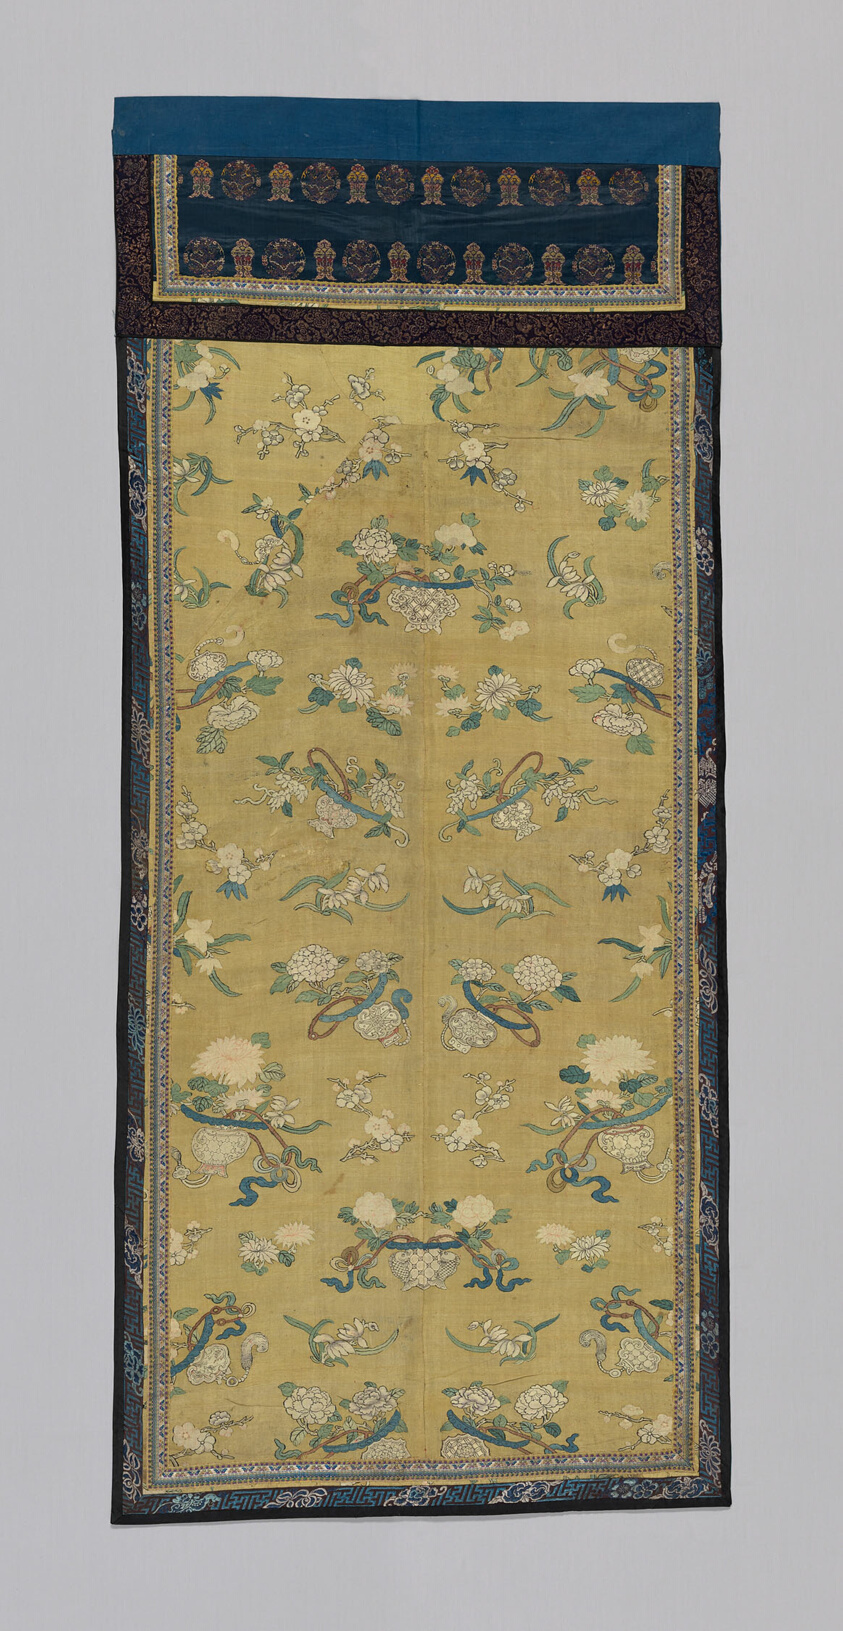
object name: Textile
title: Panel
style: qing, manchu-style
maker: Manchu (China)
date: Qing dynasty (1644–1911), 1775/1800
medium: Center: silk and gold-leaf-over-lacquered-paper-strip-wrapped silk, slit tapestry weave (kossu); painted; inner tape: silk and gold-leaf-over-lacquered-paper-strip-wrapped cotton, plain weave with supplementary patterning warps; outer tape: silk, warp-float faced 7:1 satin weave self-patterned by complementary ground weft floats; edged with cotton, warp-float faced 4:1 satin weave; glazed; backed with cotton, plain weave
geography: China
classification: textile; weaving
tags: imperial families